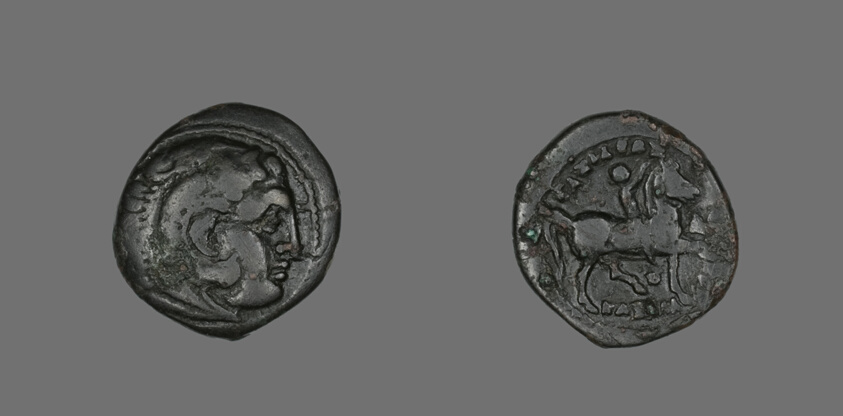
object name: Coin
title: Coin Portraying Alexander the Great as the Hero Herakles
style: greek, ancient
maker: Greek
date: 306-297 BCE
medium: Bronze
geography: Kavála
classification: coin; ancient art; struck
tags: alexander the great, Heracles